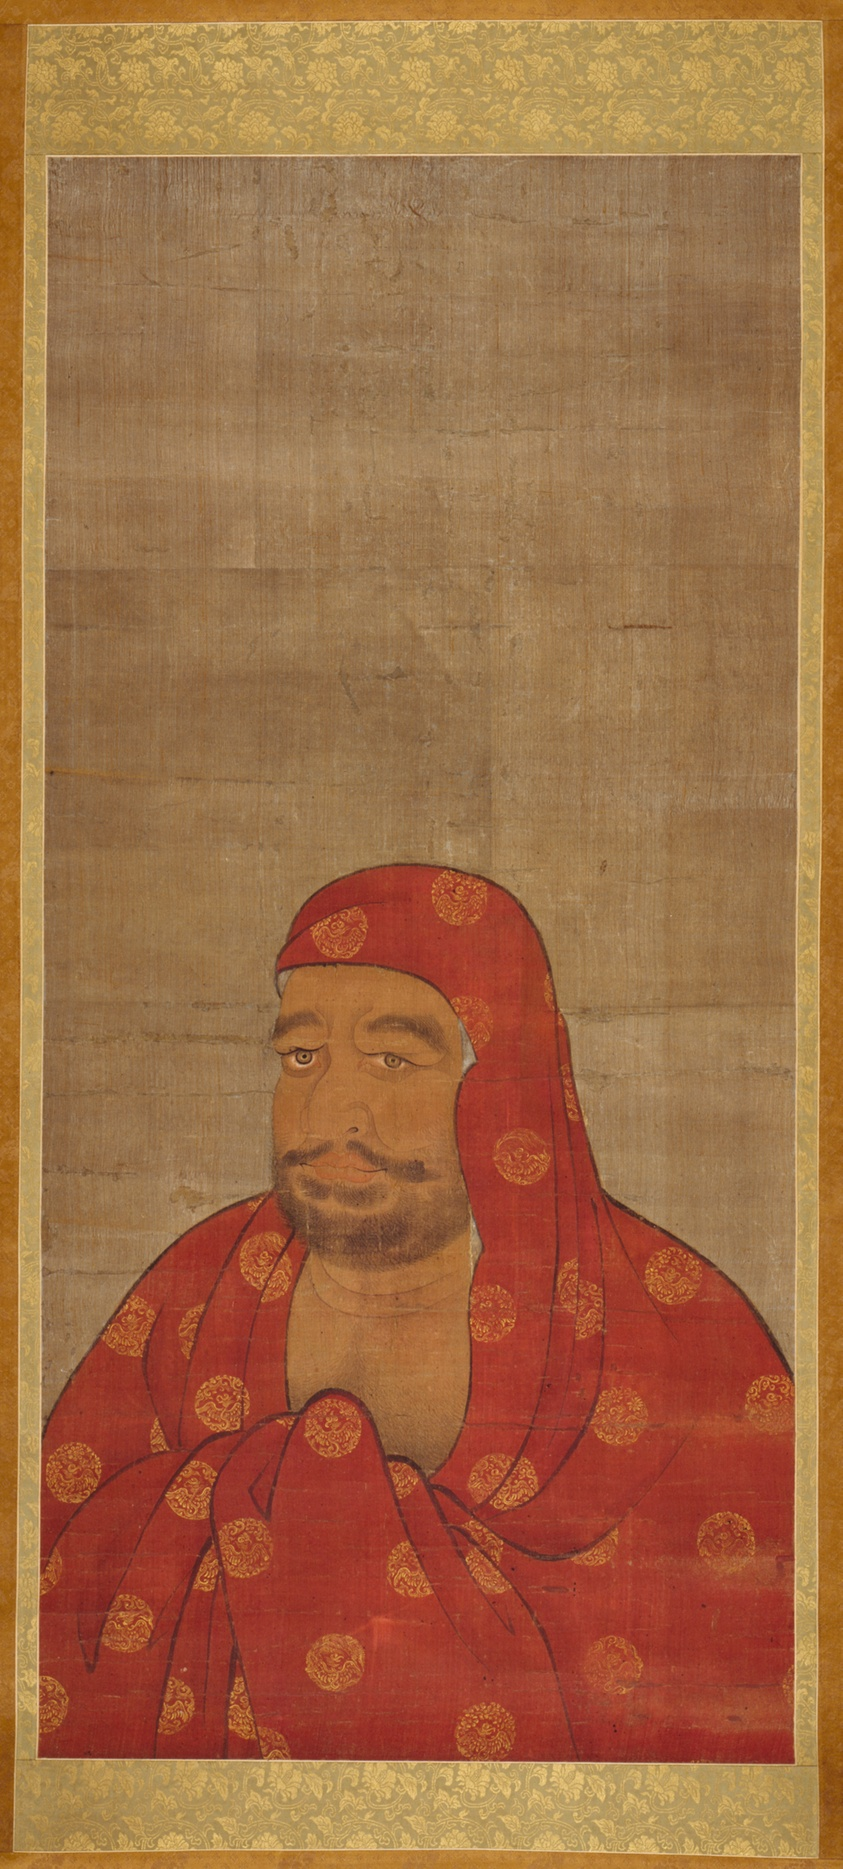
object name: Painting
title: Daruma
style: Japanese (culture or style)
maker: Artist unknown; Japanese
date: c. 1550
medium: Hanging scroll; ink, colors, and gold on silk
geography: Japan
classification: hanging scroll; painting; asian art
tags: Buddhism, religion